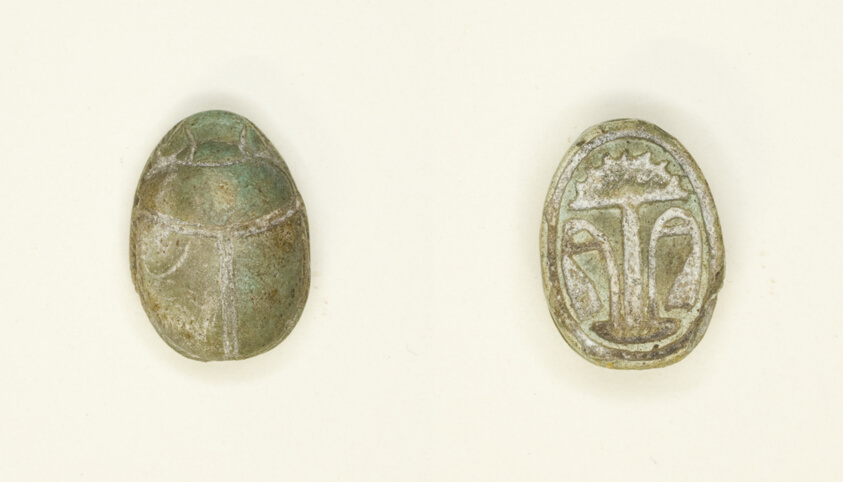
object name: Costume and Accessories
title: Scarab: Floral Motif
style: second intermediate period, new kingdom, ancient, hyksos, egyptian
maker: Egyptian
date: Second Intermediate Period – early New Kingdom, Dynasties 15–18 (about 1650–1295 BCE)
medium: Glazed steatite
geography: Egypt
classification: scarab; ancient art; costume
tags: scarab beetle, insects, plant-derived motif